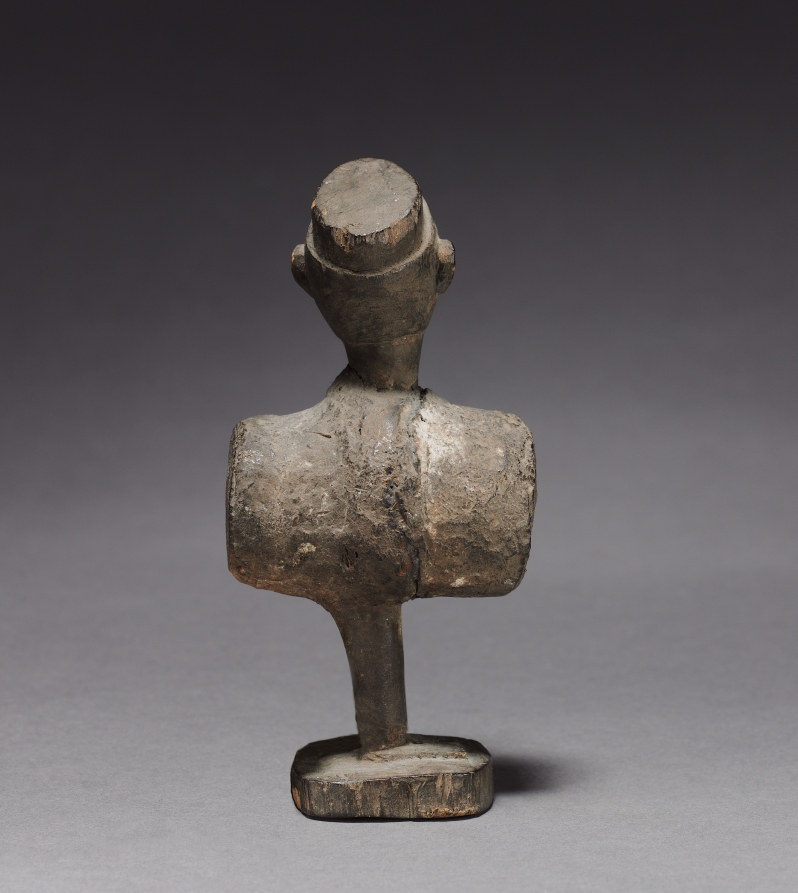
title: Power figure (nkisi)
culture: Africa, Central Africa, Republic of the Congo, Kongo-style maker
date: late 1800s-early 1900s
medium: Wood, organic materials (including resin), and metalized glass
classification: Sculpture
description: One of seven anthropomorphic figurines, these minkisi contained medicines in which an ancestral spirit was believed to reside. The medicines served a metaphorical rather than literal purpose in the resolution of conflicts among Kongo people. This figure contained white- and red-colored medicine loads on its belly and back. Its pose may refer to the nkisi’s capacity to see more than others.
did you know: The nduda minkisi were loaded with gunpowder and/or medicine to protect their owners and to shoot “witches” and other enemies.